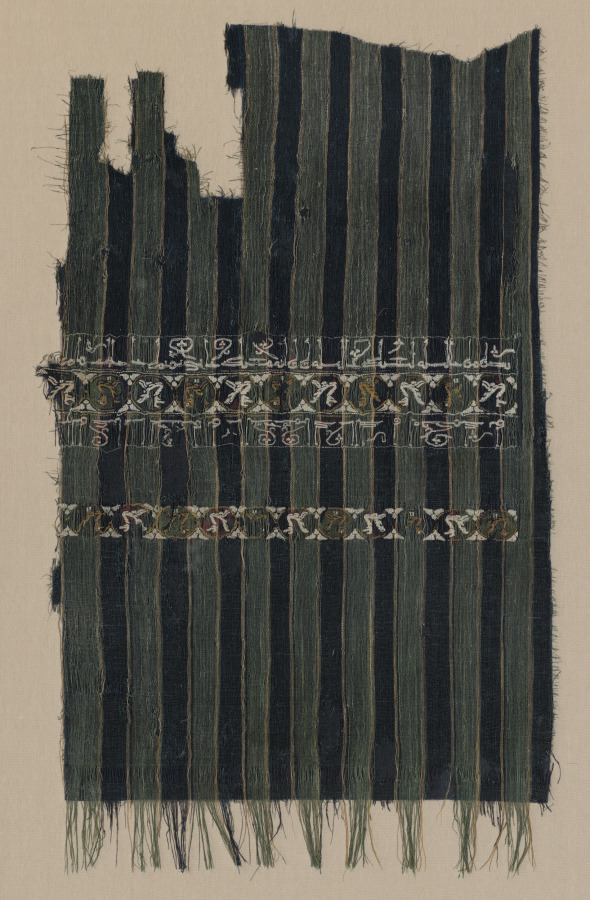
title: Striped tiraz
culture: Egypt, Fatimid period, reign of al-Mustansir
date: 1049–50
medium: plain weave with inwoven tapestry weave: linen and silk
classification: Textile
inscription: The lower line reads, "Help from Allah to the servant and friend of Allah, Ma’add Abu Tamin the Imam a[l-Mustansir bi-Allah]. . . ." The upper line reads, ". . . al-barakat al-Husayn bin al-Shaykh(?) ‘Imam al-Dawlah Muhammad bin [Ahmad]. . . ."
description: This rare striped, lightweight linen cloth was probably worn wrapped as a turban with the decorated end shown off in the front. The small birds in roundels appear to be mythological harpies with human faces. The Arabic text written with letters ending in fancy trefoils contains historical data, known as tiraz. The complete text generally includes Muslim blessings, the name of the ruler, and the place and date of manufacture. The lower line reads, "Help from Allah to the servant and friend of Allah, Ma’add Abu Tamin the Imam a[l-Mustansir bi-Allah]. . . ." The upper line reads, ". . . al-barakat al-Husayn bin al-Shaykh(?) ‘Imam al-Dawlah Muhammad bin [Ahmad]. . . ."